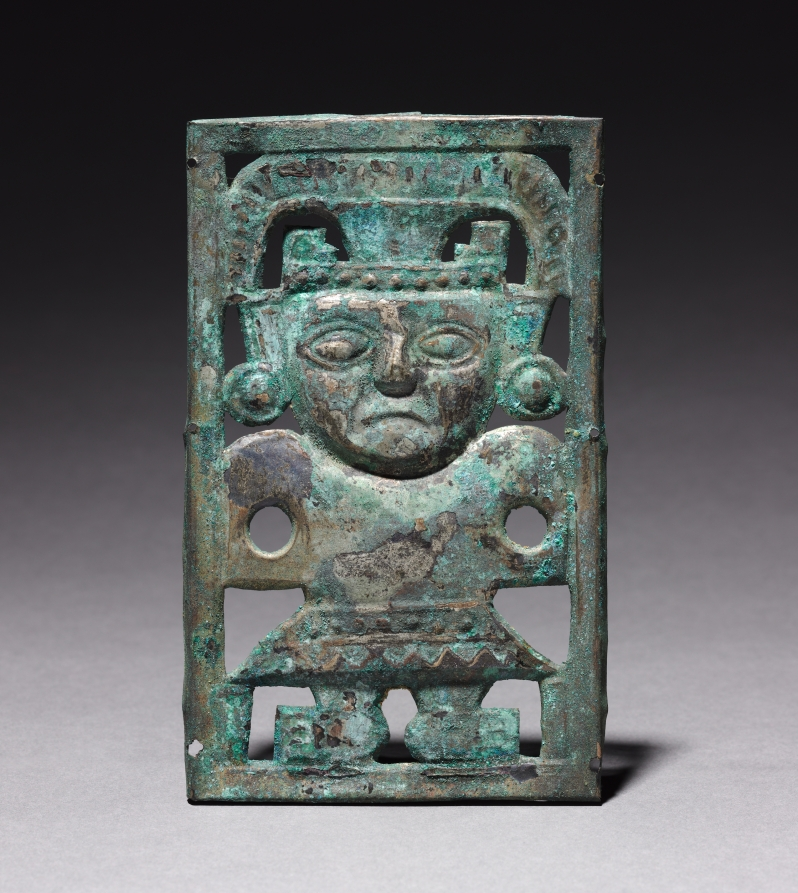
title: Plaque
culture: Peru, North Coast, late Chimú Culture, 14th-15th century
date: 1300s-1400s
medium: bronze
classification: Metalwork